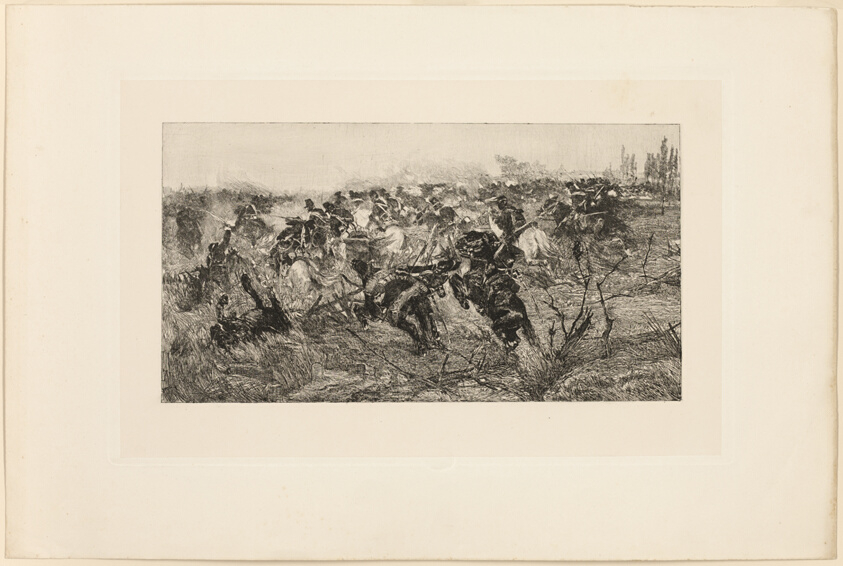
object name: Print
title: The Cavalry Charge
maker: Giovanni Fattori (Italian, 1825-1908)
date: 1889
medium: Etching, with drypoint and plate tone, on ivory wove paper, laid down on ivory wove paper (chine collé)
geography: Italy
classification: etching; paper; print; prints and drawing